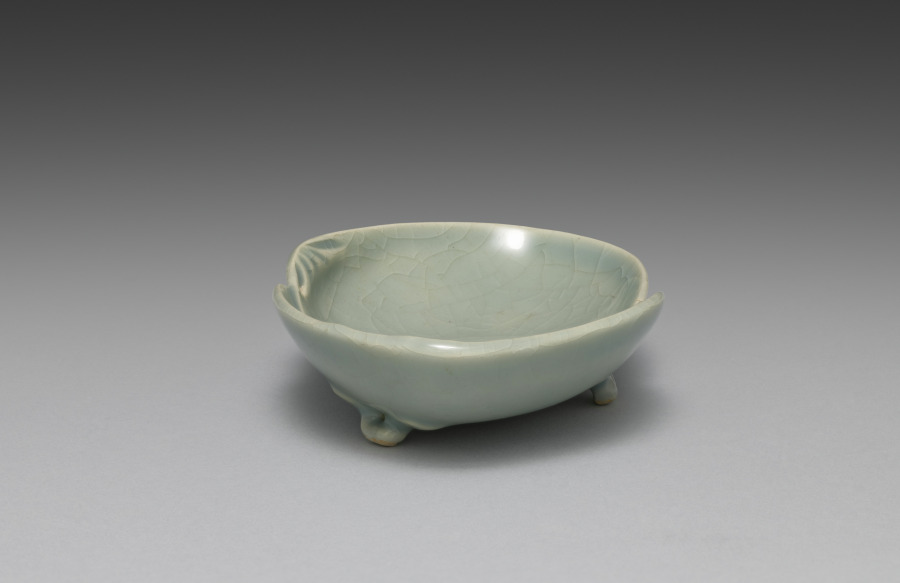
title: Dish from Saucers with Matching Shells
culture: Japan, Meiji period (1868–1912)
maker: Seifū Yohei III (Japanese, 1851–1914)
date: 1893–1914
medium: Porcelain with molded design and green crackled glaze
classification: Ceramic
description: Yohei III’s main output for his sophisticated clientele was in the form of tea sets and dining sets. He created a range of dishes in green glazes. He often produced in pairs, sets of five, or sets of ten. The set of five dishes with a more complex form is described as having a “water-colored glaze” (mizuiroyū). These are shaped like clam half shells, a reference to a game in which shell halves painted with narrative scenes or a variety of motifs must be matched back together by the players. The dishes have molded details to articulate the shell forms, and the crackling across each shell adds another dimension to the surface. Each dish is set on three small feet, formed by a pinched piece of clay and attached to an unglazed area on the underside of the dish. Curiously, while four of the dishes are stamped with the artist’s mark, one has instead a signature carved into the base.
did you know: The saucers are meant to look like matched halves of clam shells in reference to a once popular game.